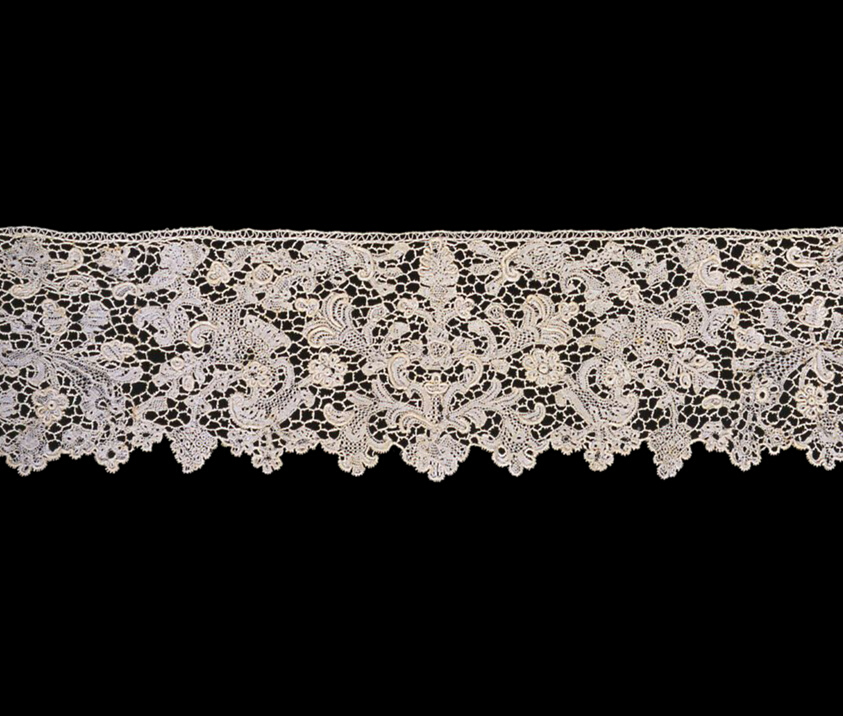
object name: Textile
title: Border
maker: France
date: c. 1700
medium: Linen, needle lace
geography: France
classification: textile; lace - needle